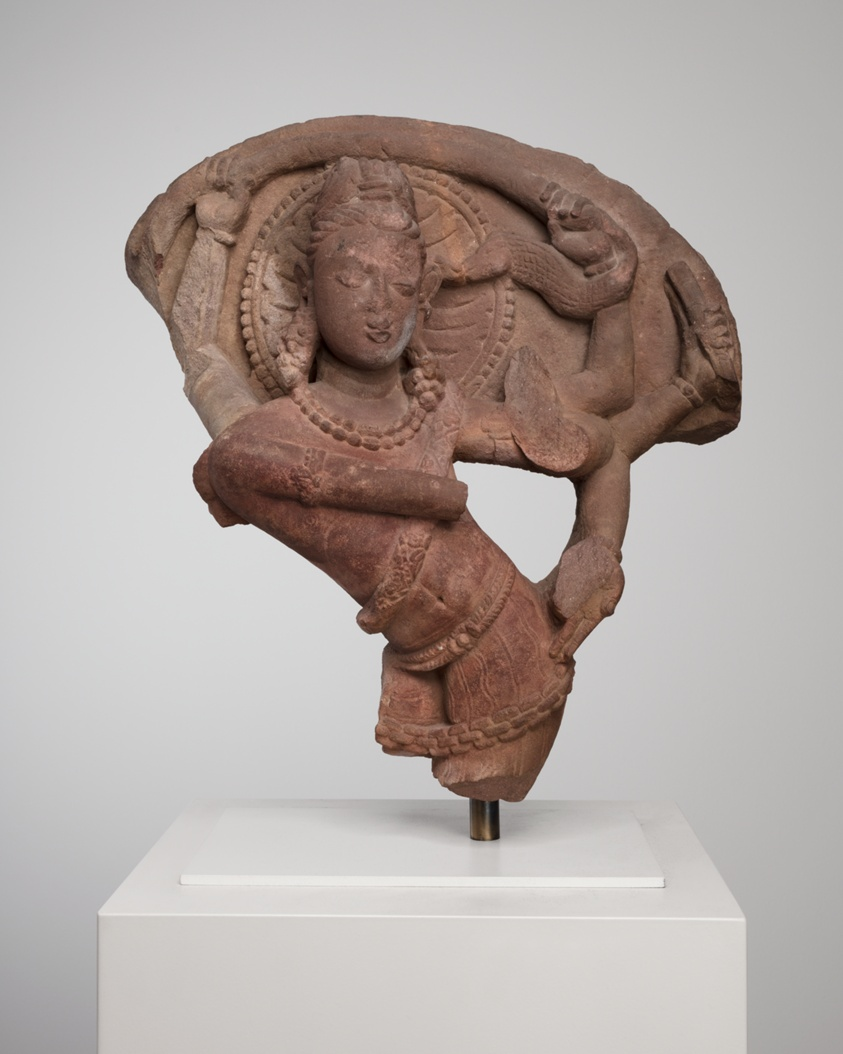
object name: Sculpture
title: Dancing God Shiva (Natesha)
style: South Asian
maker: India; Rajasthan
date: 10th/11th century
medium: Sandstone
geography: Rajasthan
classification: stone (unidentified); stone; sculpture; asian art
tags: dancing, gods (deities), Hindu, religion, Shiva Nataraja